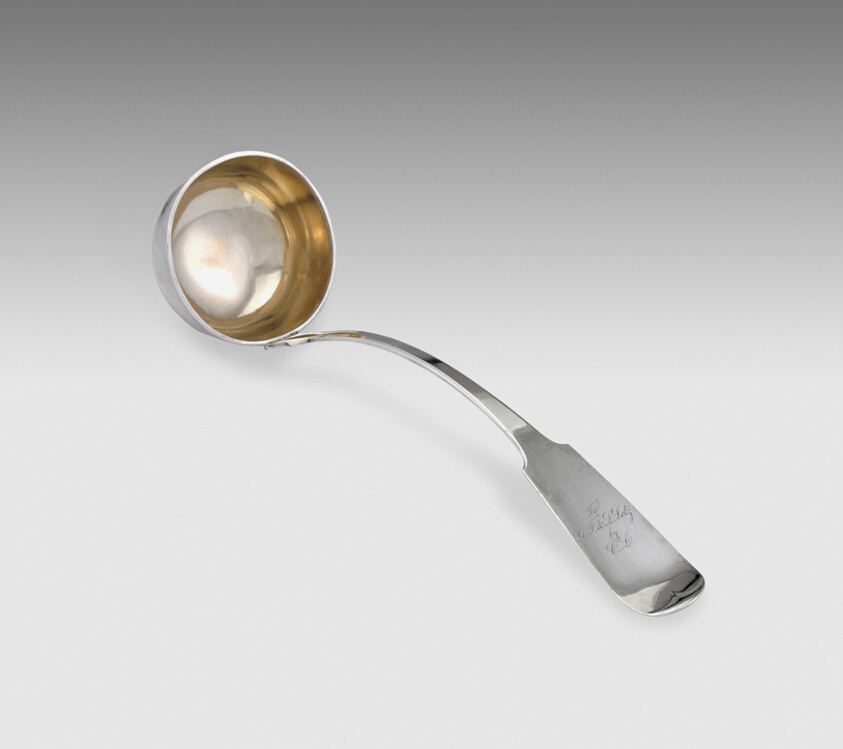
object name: Metalwork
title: Ladle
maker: Augustus F. Otto (American, c. 1804–1890); Chicago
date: 1843–64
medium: Silver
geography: Chicago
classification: ladle; utensil for serving food; utensil; silver; american decorative arts; american arts; decorative arts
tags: Chicago